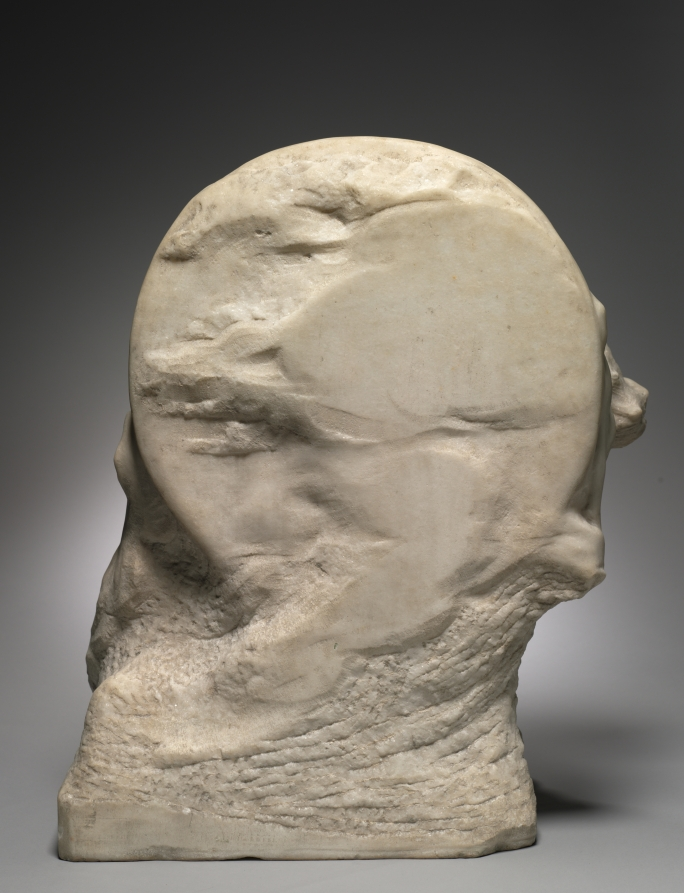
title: Dawn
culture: America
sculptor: Chester Beach (American, 1881–1956)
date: 1912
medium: marble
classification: Sculpture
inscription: Signed on side: CB (monogram) Roma 1912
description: Created while Chester Beach was living in Rome, Dawn features a nude man on horseback against a background of human forms emerging from a cloud of rolling mist. Although carved in the round from a block of marble, the sculpture has one primary view.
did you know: Chester Beach traded two of his sculptures to a farmer in Brewster, NY, obtaining land where he built his studio and a summer home.